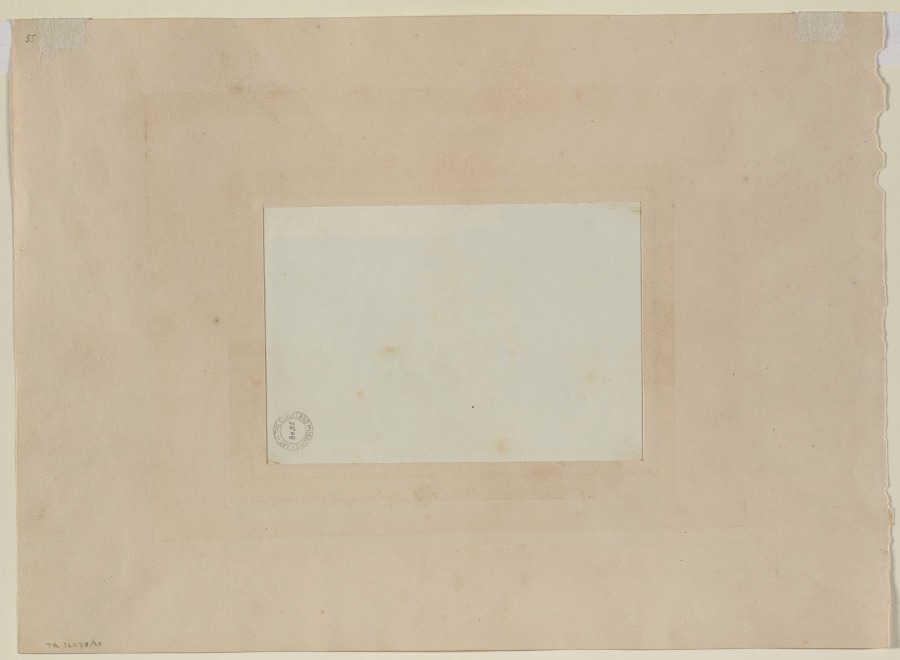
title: View of the Basilica of St. Peter from the West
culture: Austria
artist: Joseph Molitor (Austrian, after 1837)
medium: watercolor with traces of graphite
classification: Drawing